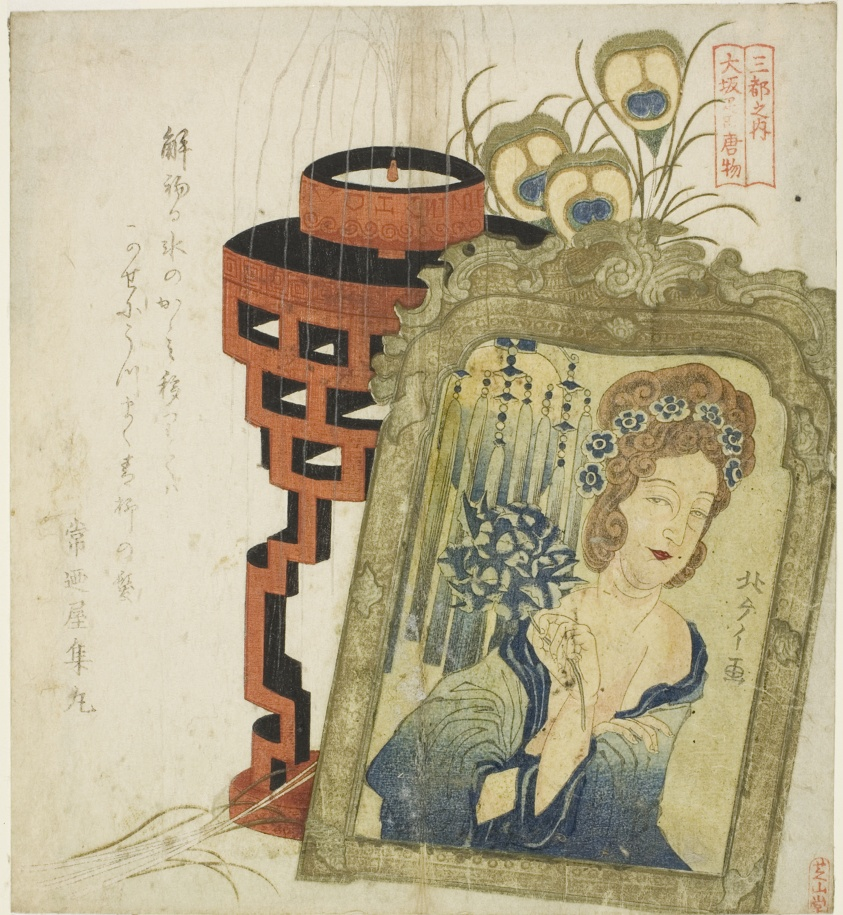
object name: Print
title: Foreign Goods in Osaka (Osaka hikita karamono), from the series "Three Cities (Santo no uchi)"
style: Japanese (culture or style)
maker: Totoya Hokkei (Japanese, 1780-1850)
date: c. 1818/30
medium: Color woodblock print; shikishiban, surimono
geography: Japan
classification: woodblock print; print; asian art